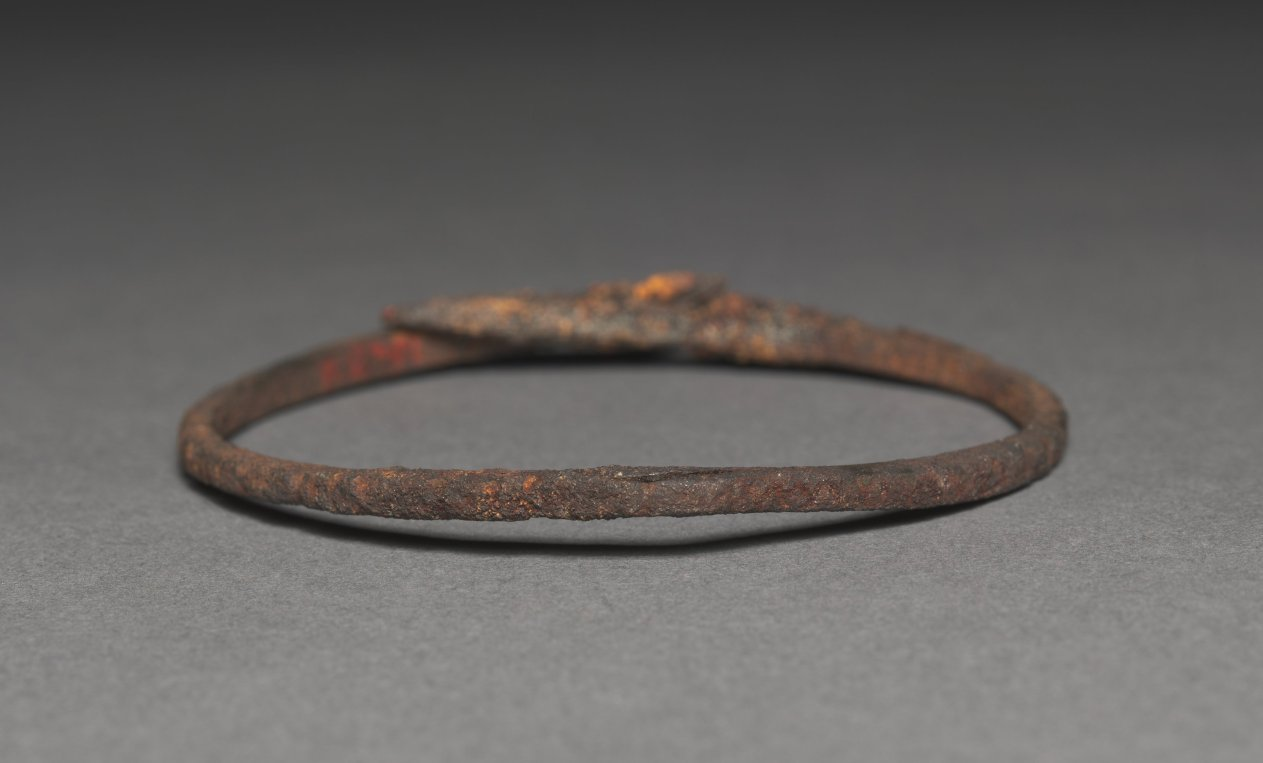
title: Bracelet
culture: Egypt, Greco-Roman period (332 BCE–395 CE), Roman empire (30 BCE–395 CE)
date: 200–400 CE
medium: iron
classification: Jewelry